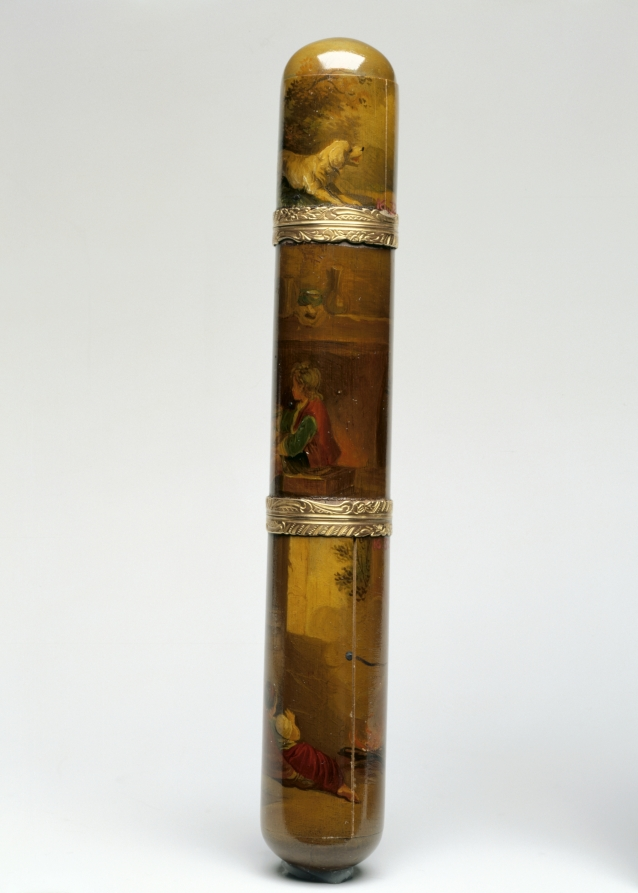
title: Perfume Case (Etui flaconnier)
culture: France, 18th century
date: c. 1780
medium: painted wood with gilt metal mounts, tortoiseshell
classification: Cosmetic Objects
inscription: Unmarked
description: Resting inside this case is a small octagonal crystal flask that would have held perfume. The painted miniatures are decorated with vernis martin, a popular varnish that imitated East Asian true lacquer. These scenes of rural merriment were often miniature reproductions of well-respected artists of the period. The depiction of three children and a dog on the lower portion of the case was drawn from Jean-Honoré Fragonard’s The Happy Family (L’heureuse fécondité) (1777).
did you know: Perfume was an important part of the French toilette, a lengthy ritual of washing and dressing practiced by members of the French social elite.